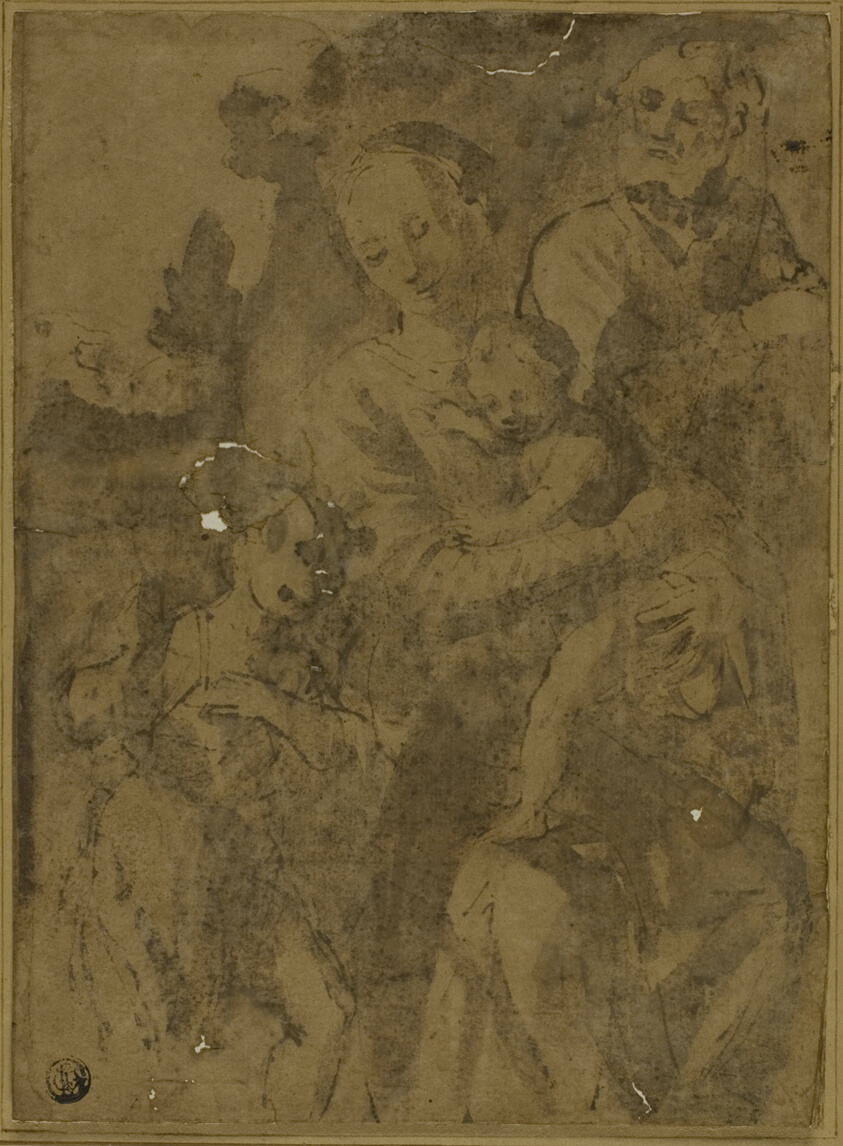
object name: Drawing and Watercolor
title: Holy Family with the Infant John the Baptist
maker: Follower of Luca Cambiaso (Italian, 1527-1585)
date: c. 1600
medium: Pen and brown ink and brush and brown wash, on tan laid paper, laid down on ivory laid paper, tipped onto tan wove paper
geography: Italy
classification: ink and wash; drawings (visual works); prints and drawing